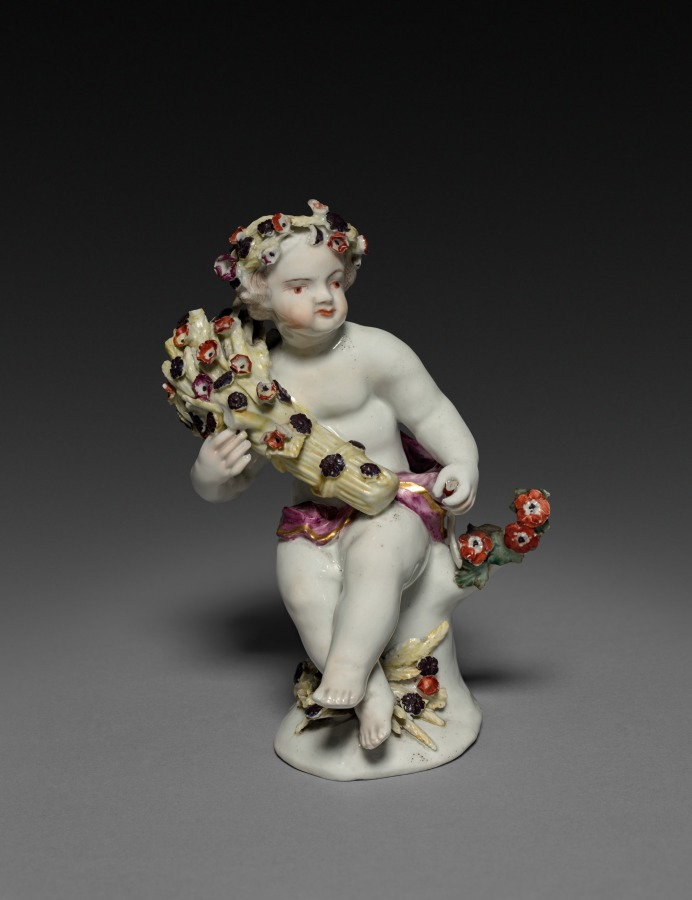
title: Summer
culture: England, Derby, 18th century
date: c. 1760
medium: soft-paste porcelain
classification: Ceramic